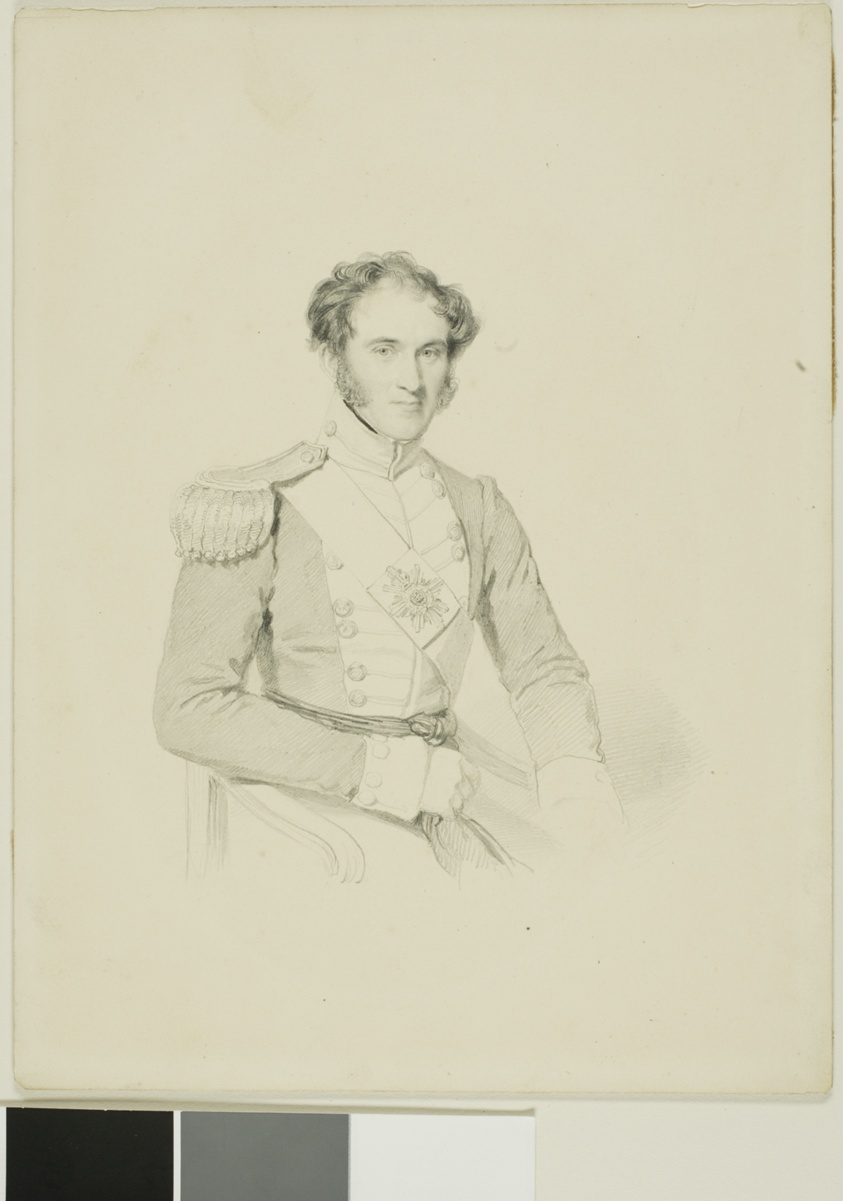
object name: Drawing and Watercolor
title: Colonel Impitt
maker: Attributed to Samuel Cousins; English, 1801-1887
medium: Graphite on cream wove card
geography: England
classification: graphite; drawings (visual works); prints and drawing